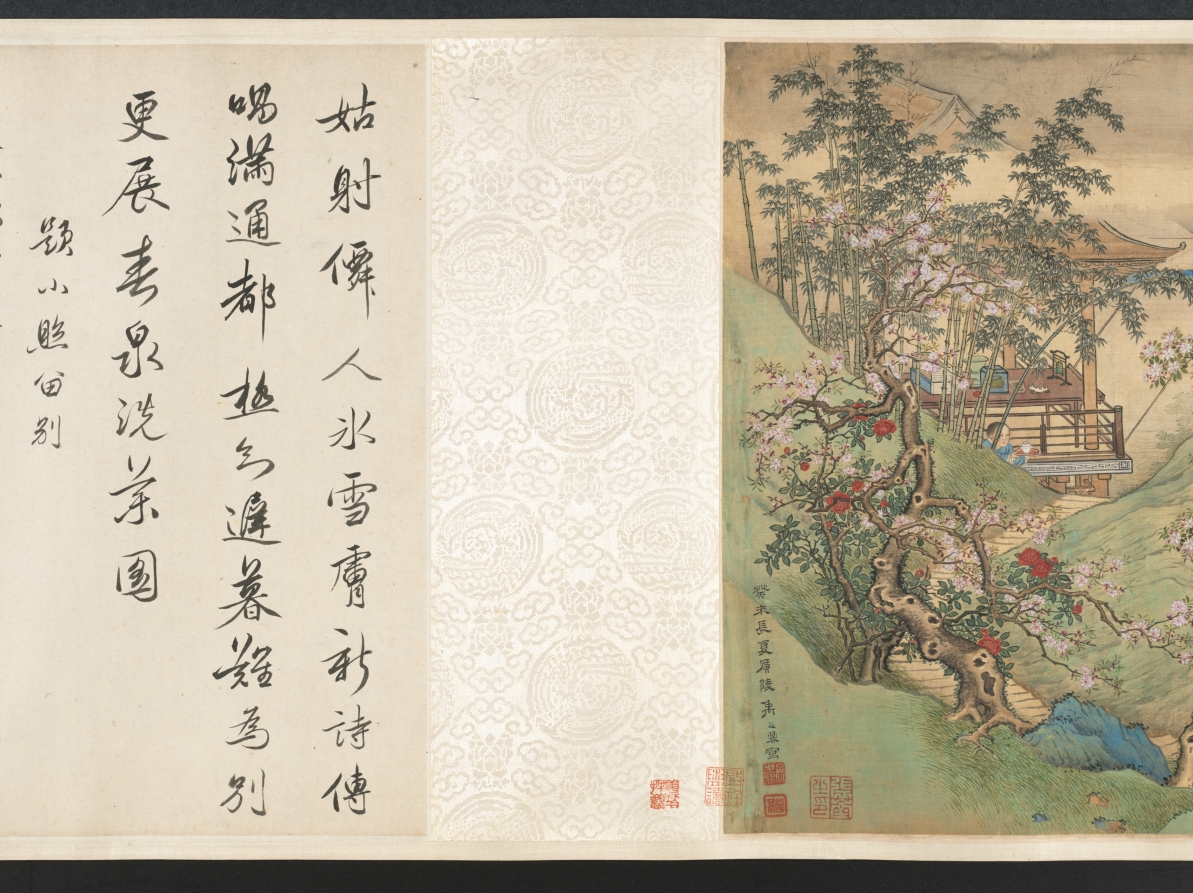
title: Cleansing Medicinal Herbs in the Stream on a Spring Day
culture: China, Qing dynasty (1644-1911)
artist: Yu Zhiding (Chinese, 1647–c. 1716)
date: 1703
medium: Handscroll; ink and color on silk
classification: Painting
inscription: Title by Chen Yixi.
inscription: 姑射仙人冰雪膚，新詩傳唱滿通都。/ 極知遲暮難為別，更展春泉洗藥圖。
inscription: Colophon by Chen Tingjing 陳廷敬 (1639–1712). Colophon by Wang Hongxu 王鴻緒 (1645–1723), dated 1707. Colophon by Song Luo 宋犖 (1634–1714). Colophon by Liu Yan 劉巗. Colophon by Jing Xikui 涇西夔. Colophon by Liu Yan 劉巗. Colophon by Cao Yin 曹寅. Colophon by Wang Shihong 汪士鋐. Colophon by Wang Shidan 王式丹 (1645–1718), dated 1712. Colophon by Shi Shenyi 史申義 (1661–1712), dated 1712. Colophon by Yin Yuqing 殷餘慶, dated 1712.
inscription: Colophon by Chen Shixia 陳時夏, dated 1729.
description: A famous portraitist, Yu Zhiding here depicts the likeness of Shi Shenyi 史申義 (1661–1712), an official and poet. Master Shi, a sickly man, was deeply interested in medicinal science. The opening section of the scroll features a boy washing a fungus in fresh spring water, a basket of medicinal herbs by his side. Other servants carry a fan, a bundle of scrolls, and a cup of tea or hot wine. Master Shi sits in a bamboo grove, surrounded by fields of herbs. Returning swallows, pink peach blossoms, and blooming magnolia indicate spring, whereas the fungus conveys wishes for long life. The spring theme may express the artist’s wish for his friend’s recovery.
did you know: In the pavilion are some of Shi Shenyi’s scholarly accoutrements: a stack of books, an antique zun 尊 (wine vessel), a brush holder, an ink stone, and a small chime.